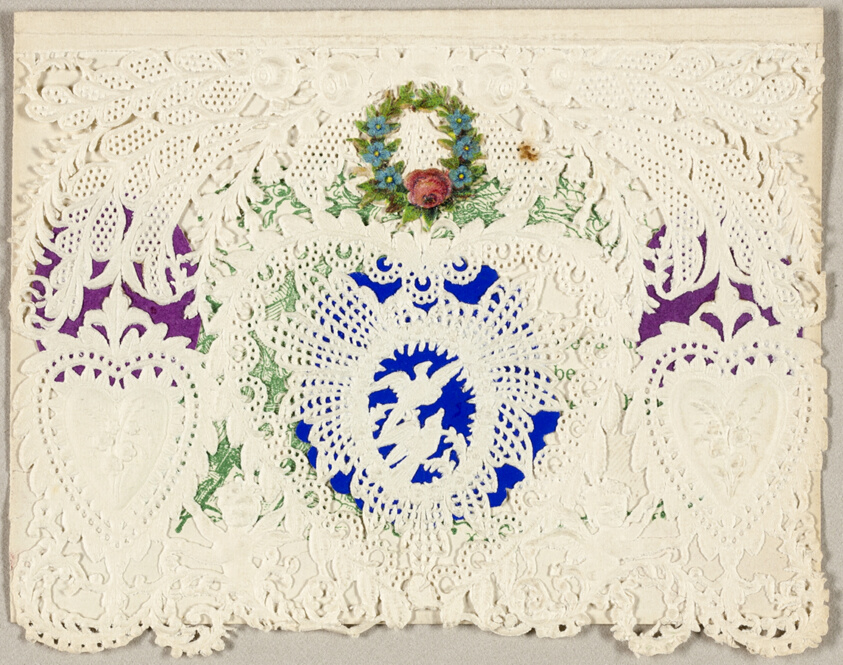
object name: Drawing and Watercolor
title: Untitled Valentine (Three Hearts)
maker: Berlin and Jones (American, 19th century)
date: c. 1865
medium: Collaged elements on cut and embossed (designed) ivory wove paper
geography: United States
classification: collage; valentine; prints and drawing; paper